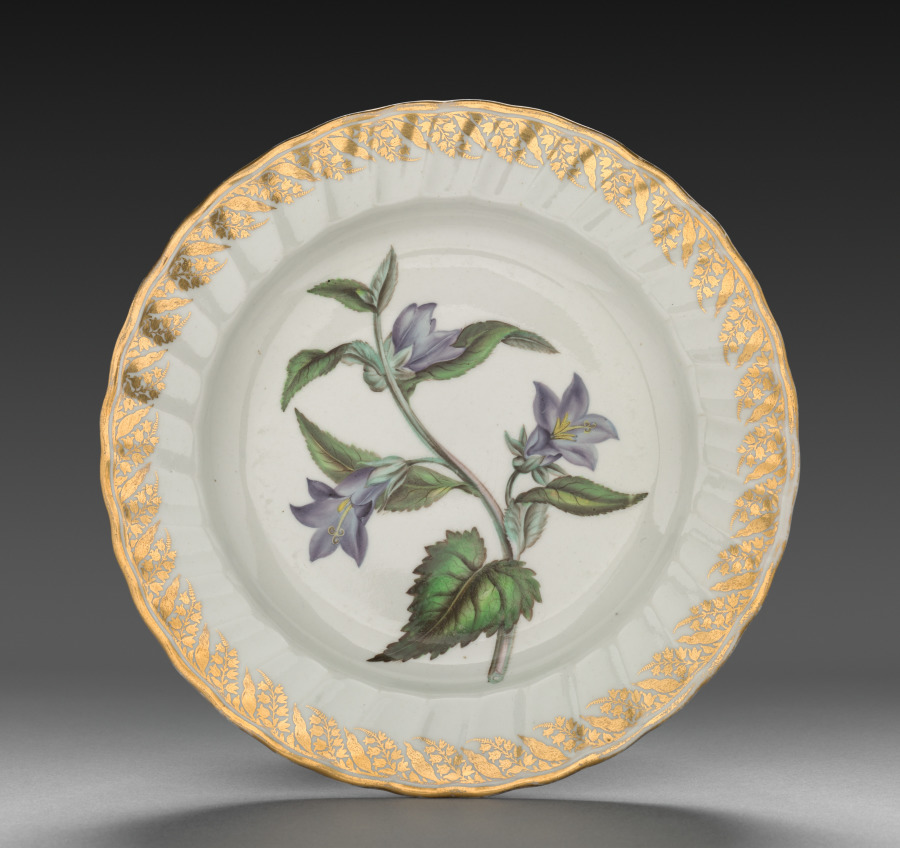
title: Plate from Dessert Service: Nettle Leaved Bell Flower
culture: England, Derby, 18th century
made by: Derby (Crown Derby Period) (British)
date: c. 1800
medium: porcelain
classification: Ceramic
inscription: inscribed in blue on back: Campanula Triechelium./Nettle Leaved Bell Flower./crown/crossed batons and dots/D/115.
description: Each dish is decorated with recognizable plants, the names of which are inscribed on the base in both Latin and English. Identifying the blossoms only became customary in the late 18th century when a single piece of porcelain was decorated with one species, and flowers were represented along with leaves, stems, seed pods, and roots. All of this reflects Carolus Linnaeus’s recent invention of a scientific method to categorize all known flora. The decorations on the Derby factory’s products derive from contemporary English botanical publications. For instance, illustrations in William Curtis’s The Botanical Magazine served as models for the French marigold and nettle-leaved bell flower on the dessert service.